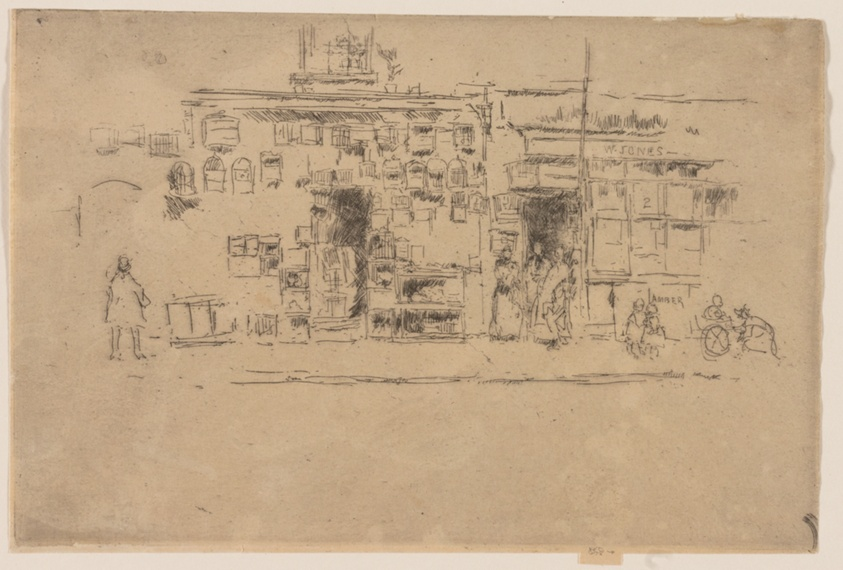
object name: Print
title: Bird-Cages, Chelsea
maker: James McNeill Whistler (American, 1834-1903)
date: 1887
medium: Etching and drypoint with foul biting in black ink on cream laid paper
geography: United States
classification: etching; foul biting; print; prints and drawing; drypoint; paper